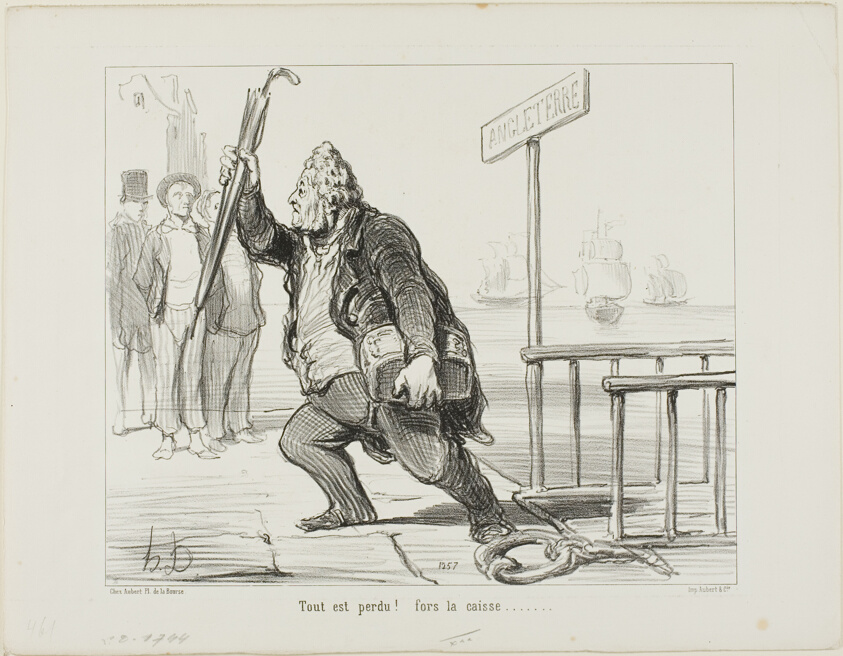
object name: Print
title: “All is lost - save the cashbox”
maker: Honoré Victorin Daumier; French, 1808-1879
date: 1848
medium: Lithograph in black on white wove paper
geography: France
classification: lithograph; print; prints and drawing